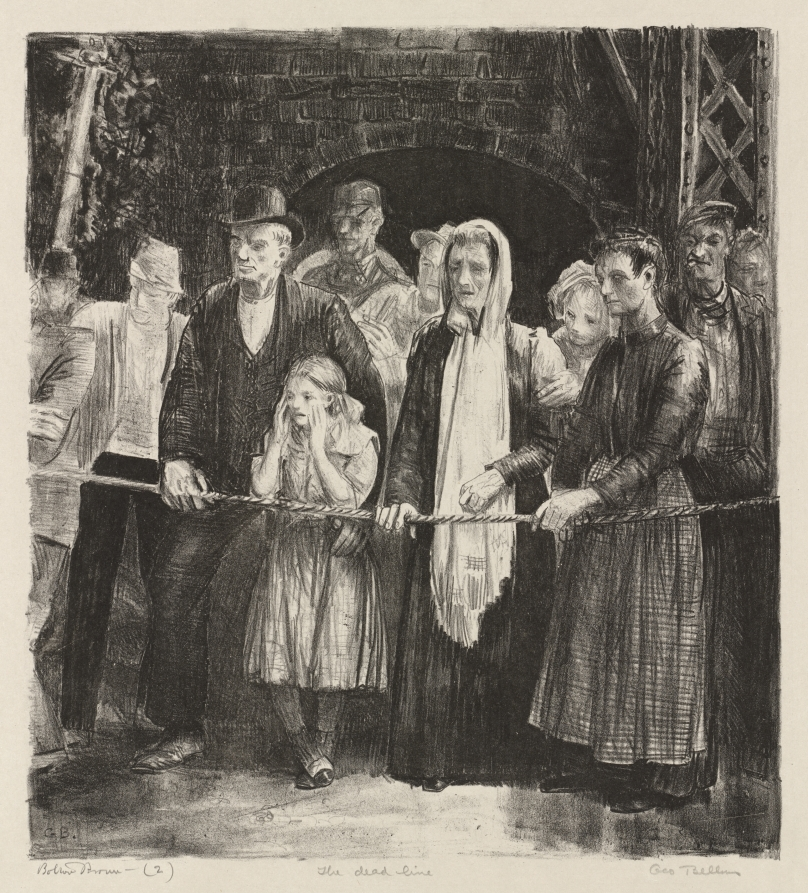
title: The Dead-line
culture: America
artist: George Bellows (American, 1882–1925)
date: 1923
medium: lithograph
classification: Print